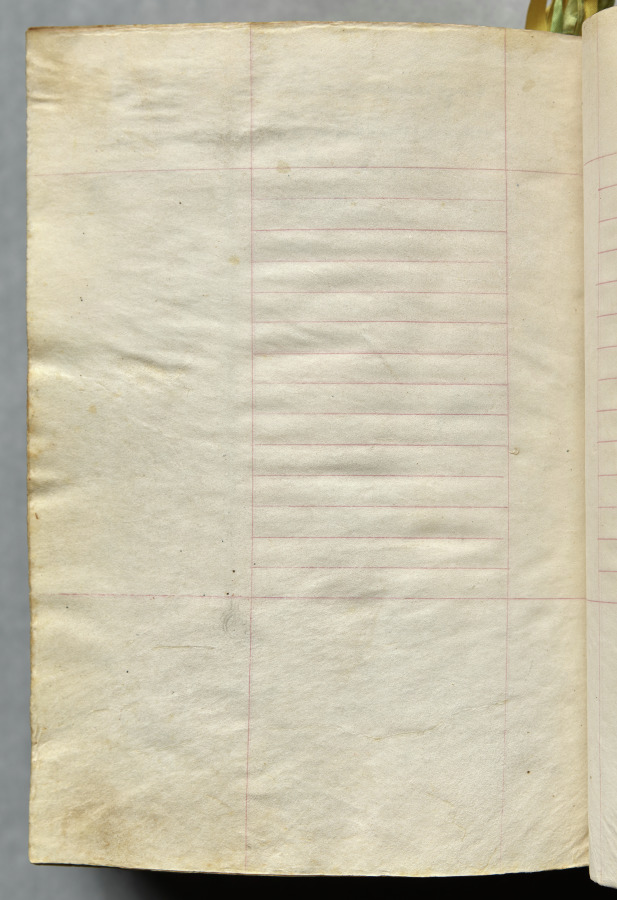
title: Hours of Charles the Noble, King of Navarre (1361-1425), fol. 326v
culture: France, Paris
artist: Master of the Brussels Initials and Associates (French)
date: c. 1405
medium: ink, tempera, and gold on vellum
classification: Bound Volume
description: This precious volume was obviously highly prized by its owner, the French-born King of Navarre, who had his coat of arms painted on no less than twenty folios. Rather than directly commissioning this manuscript from a specific workshop, it seems that Charles the Noble acquired his book of hours -- perhaps ready-made for the luxury market -- while on a trip to Paris in 1404-05. A collaborative effort, six painting styles are evidenced within the pages of this codex, those of two Italians, two Frenchmen, and two Netherlanders. The painter who was responsible for the planning and decoration of the book, and who produced seventeen of the large miniatures, was a Bolognese artist known as the Master of the Brussels Initials. His principal assistant, responsible for most of the borders, was a Florentine who signed his name "Zecho" da Firenze on folio 208 verso.